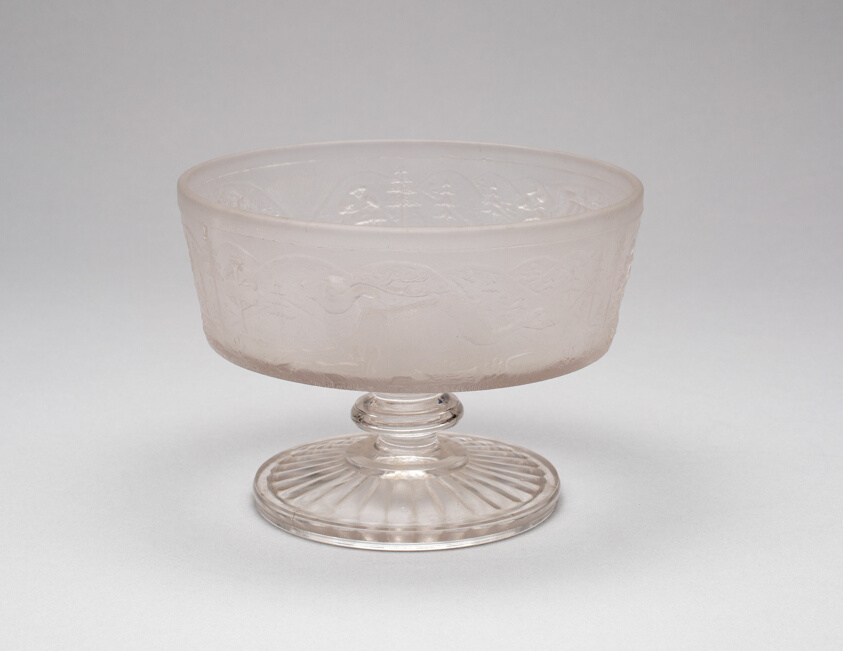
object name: Glass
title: "Westward Ho!/Pioneer" pattern footed dish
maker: Gillinder and Sons, 1861–c. 1930; Philadelphia or Greenbsburg, Pennsylvania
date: c. 1876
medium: Glass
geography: Philadelphia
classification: dish (vessel); glass; american decorative arts; american arts; decorative arts